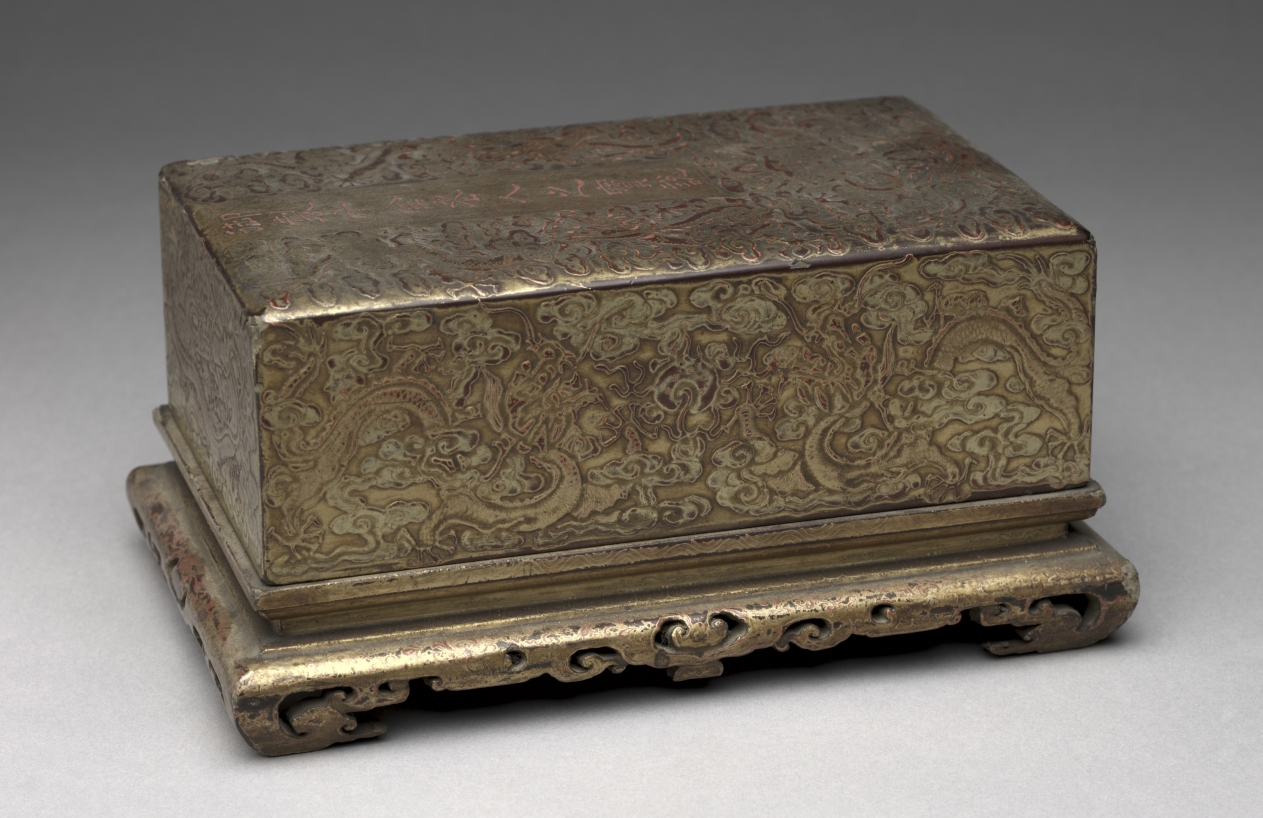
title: Box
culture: China, Qing dynasty (1644-1911)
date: 1750–99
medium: pressed sizing on wood painted with lacquer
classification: Lacquer